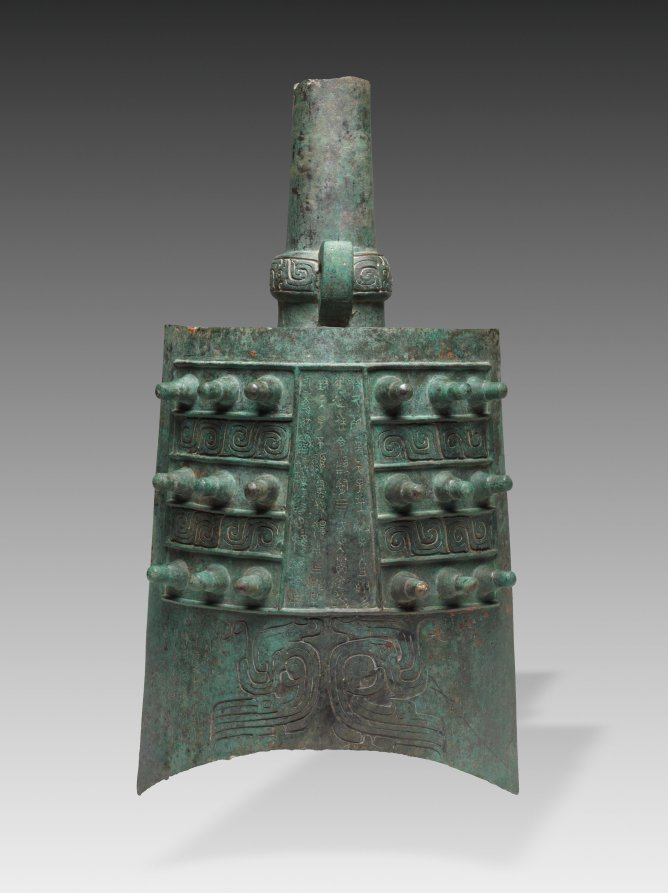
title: Bell (Lai Zhong)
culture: China, Shaanxi province, Meixian, Western Zhou dynasty (c. 1046–771 BCE)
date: c. 800–700 BCE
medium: bronze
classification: Metalwork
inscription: Lai proclaimed: "Great and illustrious was my august late father who made his heart clean following the disciplined virtue of his forefathers and dutifully served the past king. I, Lai, now succeed him in service and dare not fail. Respectfully, from dawn to dusk I will earnestly--even unto death--serve the Son of Heaven, taking as a model the obligation of my forefathers." I, Lai, was presented with many things. Then came the [king's] gracious command: "Manage the fisheries and forests of the realm." "I, Lai, dare to respond to the great, illustrious, sagely, and gracious favor of the Son of Heaven, extolling him and using this as cause to make for my august late father Gongshu a set of harmonized bells. Ding, dong, bing, bong, ding, dong, bing, bong. May they be used in acts of piety, reverently gladdening past luminaries. May the past luminaries who dwell on high help perpetuate this command, sending down upon me good fortune, tranquility, and purity. May I, Lai, live long in service to the Son of Heaven." May sons' sons and grandsons' grandsons forever treasure these [bells].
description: In ancient China, music and ritual had political significance and were linked inseparably to the power of states. During the Zhou dynasty, bronze bells were made in sets of eight to sixty bells. This bell is the second largest from a set of eight. This bell bears an inscription of 118 characters about its owner, Lai, and why it was cast. Lai's ancestors dutifully served the Western Zhou royal court, and he was granted a hereditary position by the "Son of Heaven" (the ruler). To express filial piety, Lai commissioned a set of bells as an offering to his father, Gongshu, in the hope that they would be forever treasured by future generations. This important inscription also provides an early example of Chinese calligraphy highlighting the purely abstract lines and construction of characters.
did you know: The technical sophistication of the unusual lens-shaped cavity allowed the bell to produce two different tones.